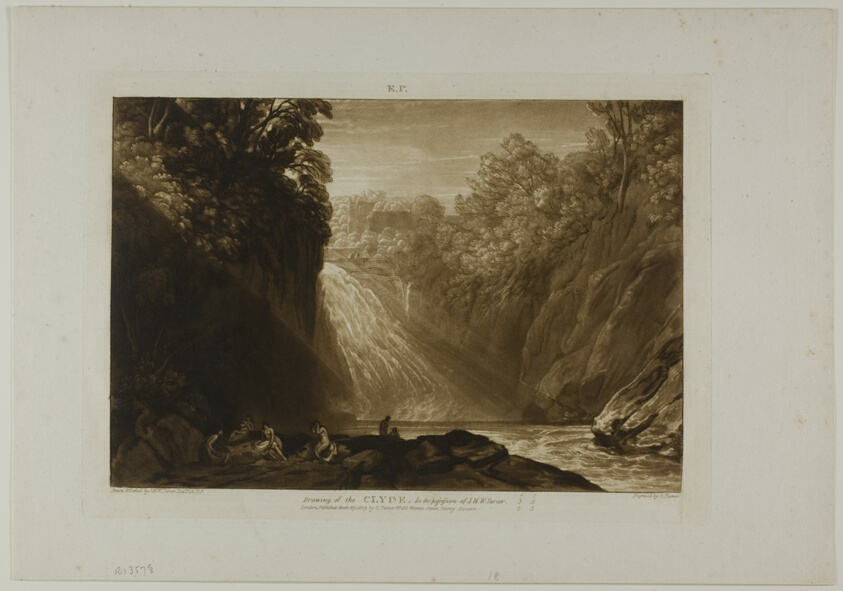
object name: Print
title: The Fall of the Clyde, plate 18 from Liber Studiorum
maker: Joseph Mallord William Turner (English, 1775-1851); Engraved by Charles Turner (English, 1773-1857)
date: published March 29, 1809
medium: Etching and engraving on ivory paper, laid down on ivory paper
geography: England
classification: etching; print; prints and drawing